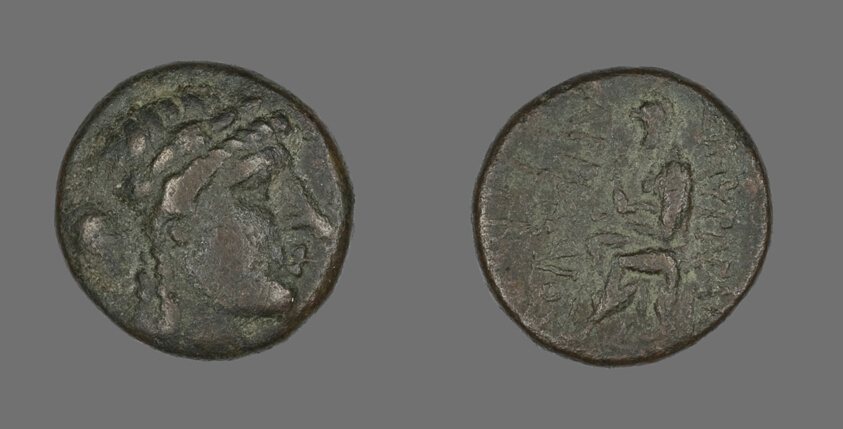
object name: Coin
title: Coin Depicting the God Apollo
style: greek, ancient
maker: Greek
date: 2nd-1st century BCE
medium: Bronze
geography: Ancient Greece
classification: coin; ancient art